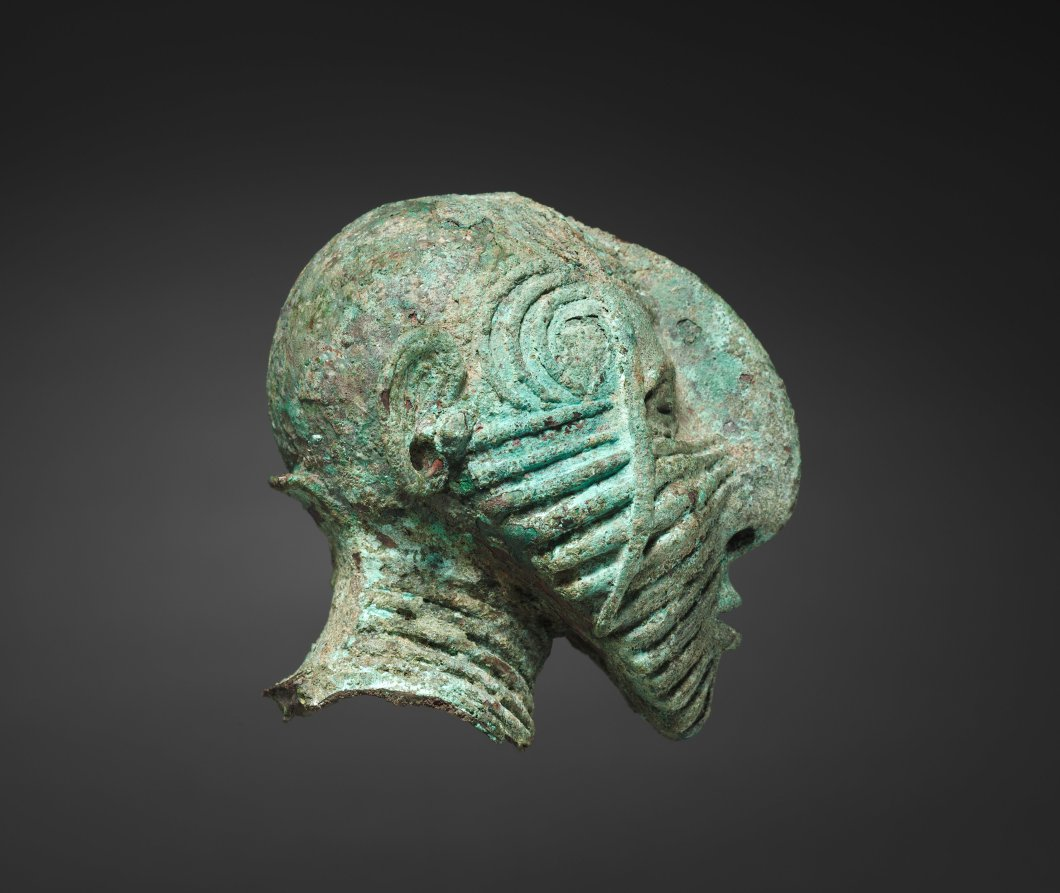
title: Male Head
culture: South East Asia, Thailand, Ban Chiang, Neolithic period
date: c. 1000 BCE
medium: bronze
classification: Sculpture